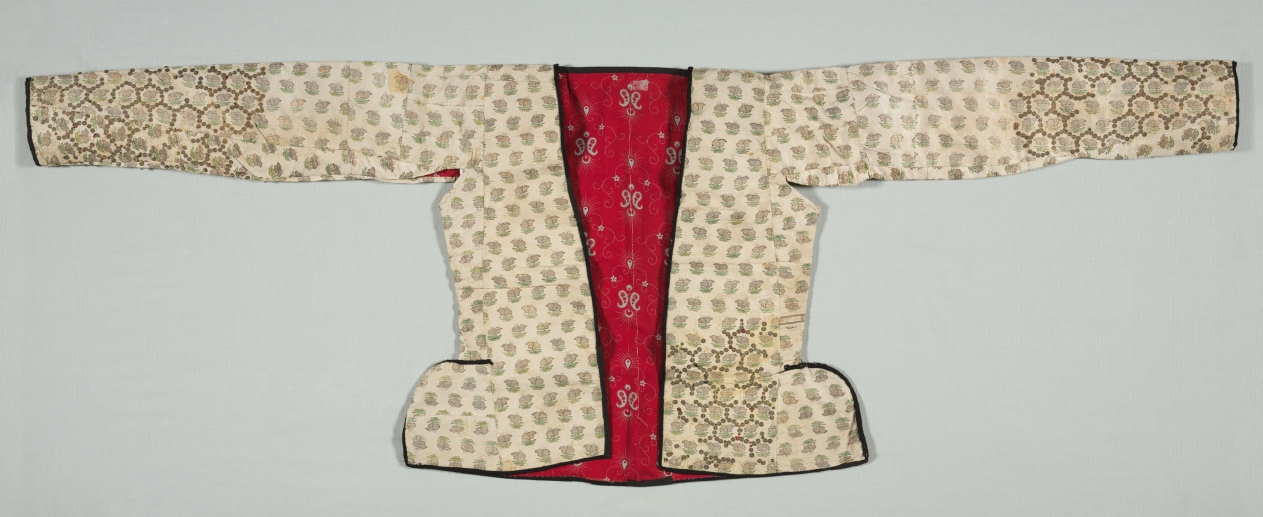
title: Jacket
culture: Iran, 18th century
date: 1700s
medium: Silk taffeta, brocaded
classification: Garment